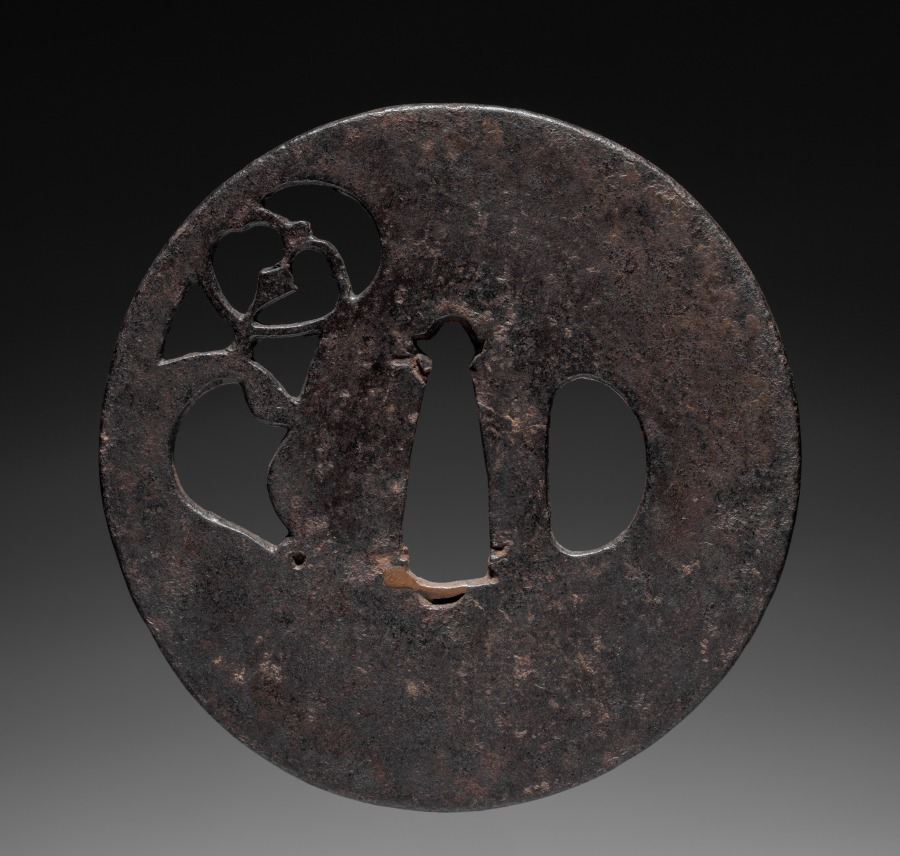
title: Sword Guard (Tsuba)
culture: Japan, possibly Edo period (1615-1868)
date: c. 1615–1868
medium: iron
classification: Arms and Armor